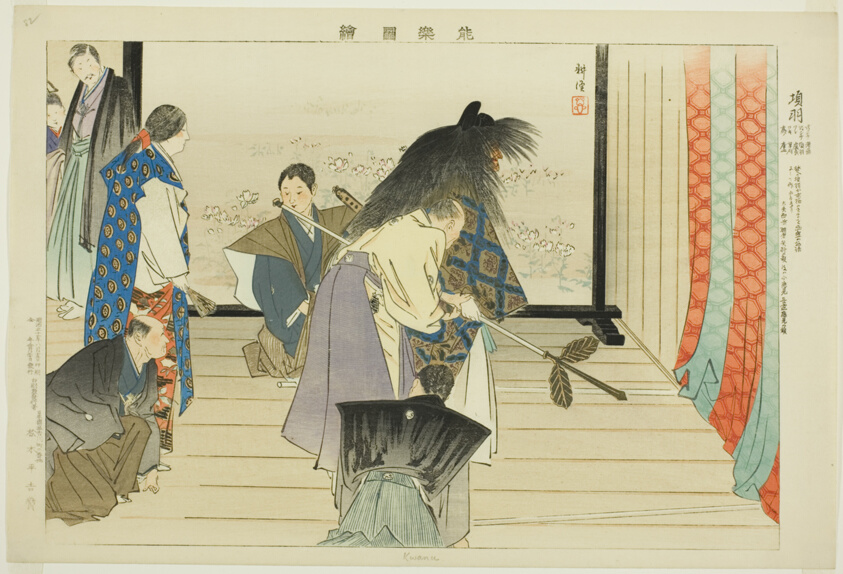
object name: Print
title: Kou, from the series "Pictures of No Performances (Nogaku Zue)"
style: Japanese (culture or style)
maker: Tsukioka Kogyo; Japanese, 1869-1927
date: 1898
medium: Color woodblock print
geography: Japan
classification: woodblock print; print; asian art